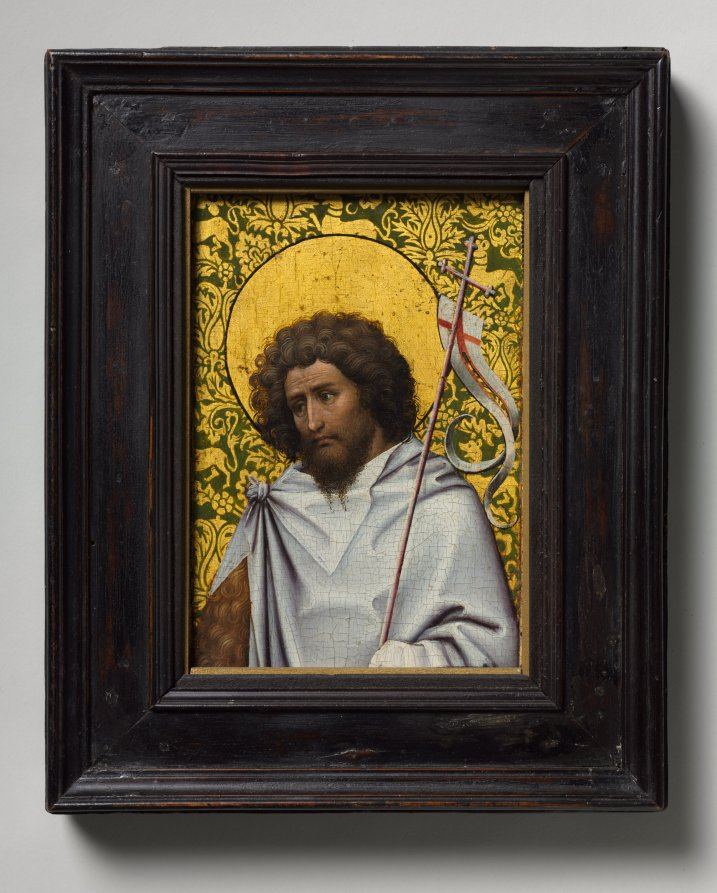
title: John the Baptist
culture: Flanders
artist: Robert Campin (Netherlandish, 1375/79–1444)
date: c. 1410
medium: oil on oak panel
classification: Painting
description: According to tradition, John the Baptist wears a hair shirt under a white cloth, associated with newly baptized Christians. The flag bearing a red cross symbolizes resurrection. In marked contrast, the background features a lavish gold-patterned silk. The display of such luxurious fabrics continues an ancient tradition of using the finest objects in the worship of God. This painting has been cut down along the lower edge and would have originally shown a full-length image of the saint. It was probably the right wing of a triptych, with John the Baptist gazing upon a central image of the Virgin and Child. Campin first settled in Tournai around 1405-6 as a free master of the guild of painters, and he bought citizenship there in 1410, which suggests he was born elsewhere. Although heavily indebted to contemporary masters of manuscript illumination, Campin displayed greater powers of realistic observation than any other painter before him. He was one of the first artists to experiment with the use of oil-based colors, in lieu of egg-based tempera, to achieve the brilliant color typical of this period.